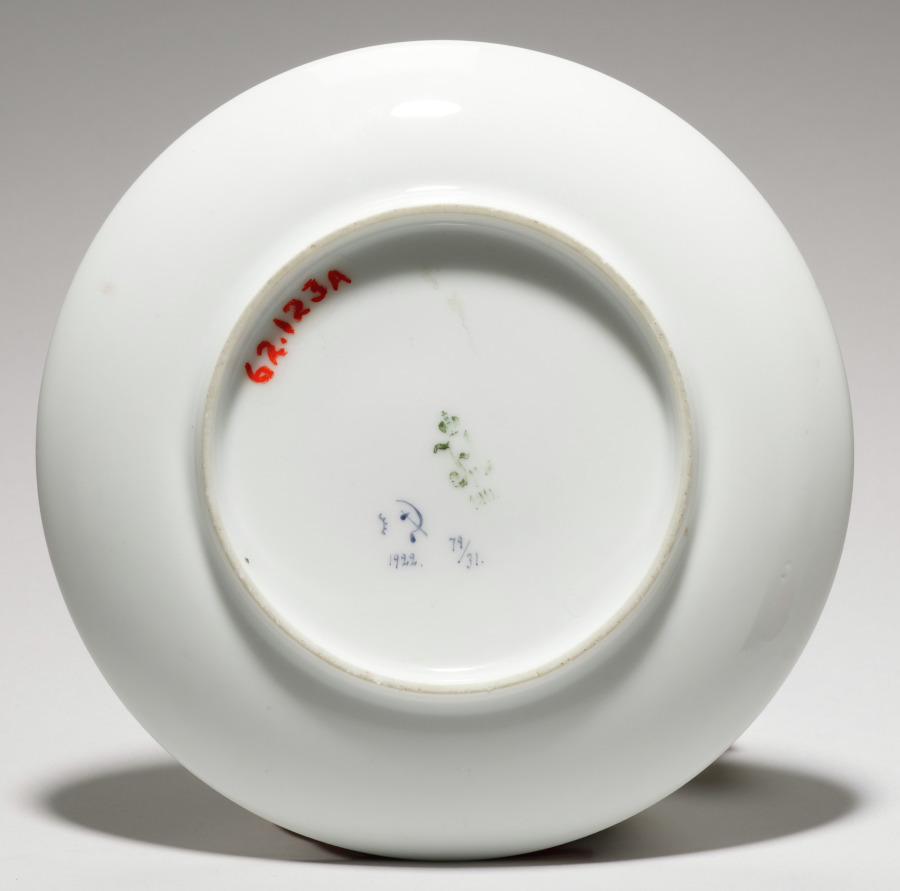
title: Saucer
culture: Russia, St. Petersburg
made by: St. Petersburg Imperial Porcelain Factory (Russian)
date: 1881–1917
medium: porcelain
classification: Ceramic